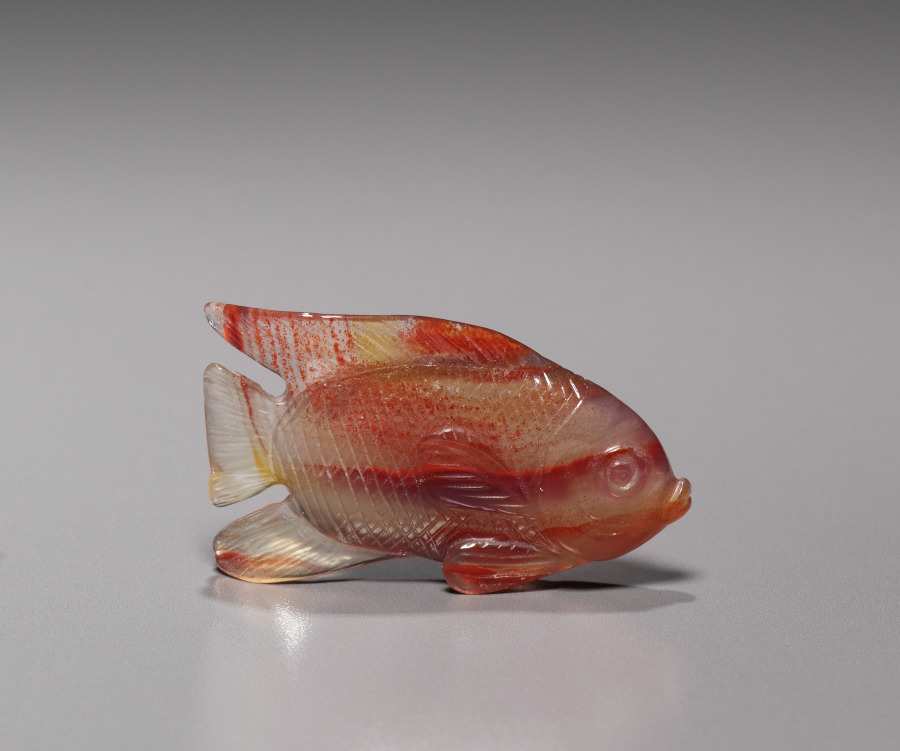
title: Fish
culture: Russia, St. Petersburg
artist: House of Fabergé (Russian, 1842–1918)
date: c. 1890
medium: agate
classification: Miscellaneous